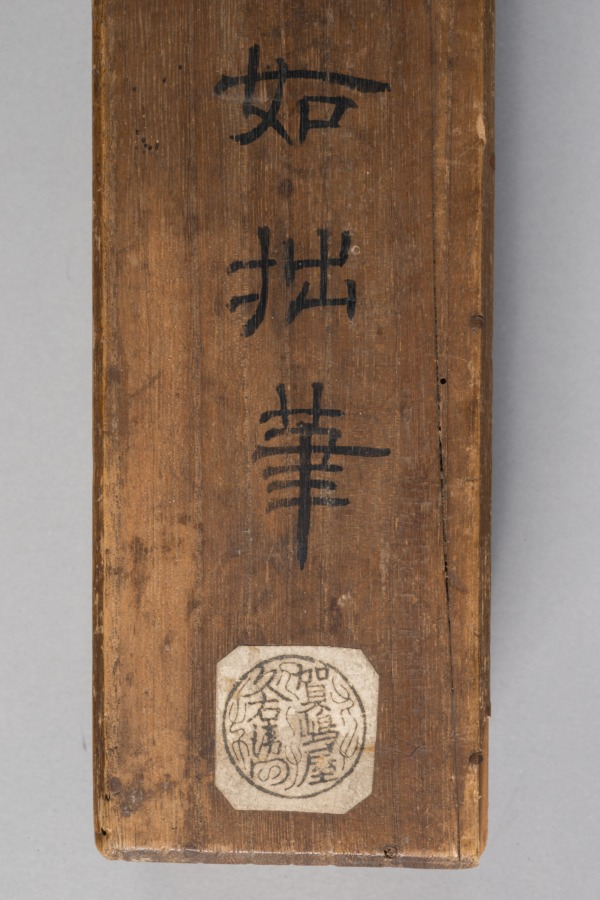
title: Landscape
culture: Japan, possibly Edo period (1615-1868)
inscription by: copy after Ishō Tokugan (Japanese, c. 1359–1437)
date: early 1600s to mid-1800s?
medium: hanging scroll; ink and slight color on paper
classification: Painting